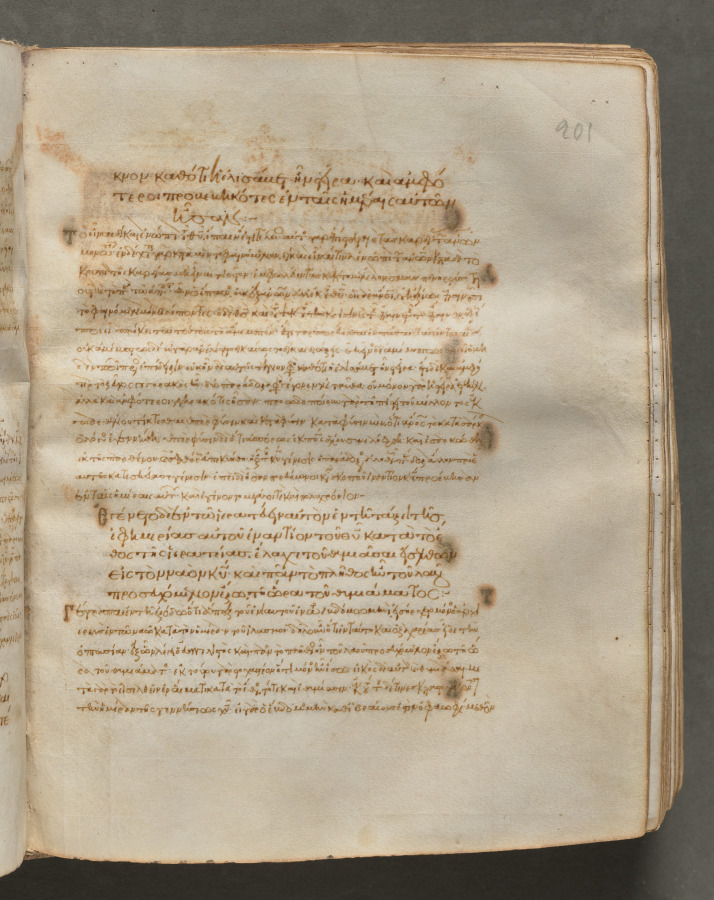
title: Text, folio 201 (recto), from a Gospel Book with Commentaries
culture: Byzantium, Constantinople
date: c. 1000–1100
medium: ink, tempera, and gold on vellum; leather binding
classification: Bound Volume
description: Each of the four gospels in this book opens on a page with brilliantly illuminated borders depicting the author of the text as well as birds-principally peacocks, symbols of the immortality of the soul-and fountains, representing the fountain of life and the salvation of the soul. This volume consists of 428 leaves with texts in Greek. Its level of sophistication suggests that it was probably written and decorated in a monastery in Constantinople.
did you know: Gospel Books were carried in procession through Byzantine churches.